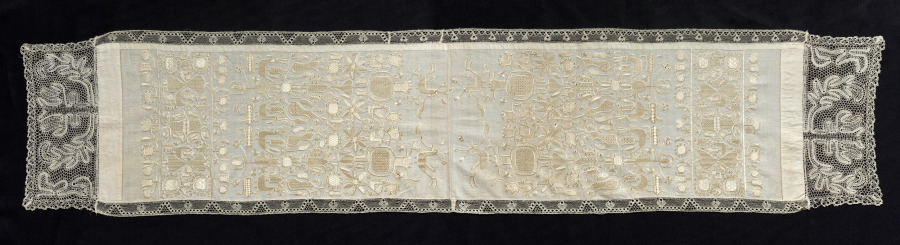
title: Lace Shawl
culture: Czechoslovakia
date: 1800s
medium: Linen: plain weave with bobbin lace and silk embroidery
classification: Embroidery